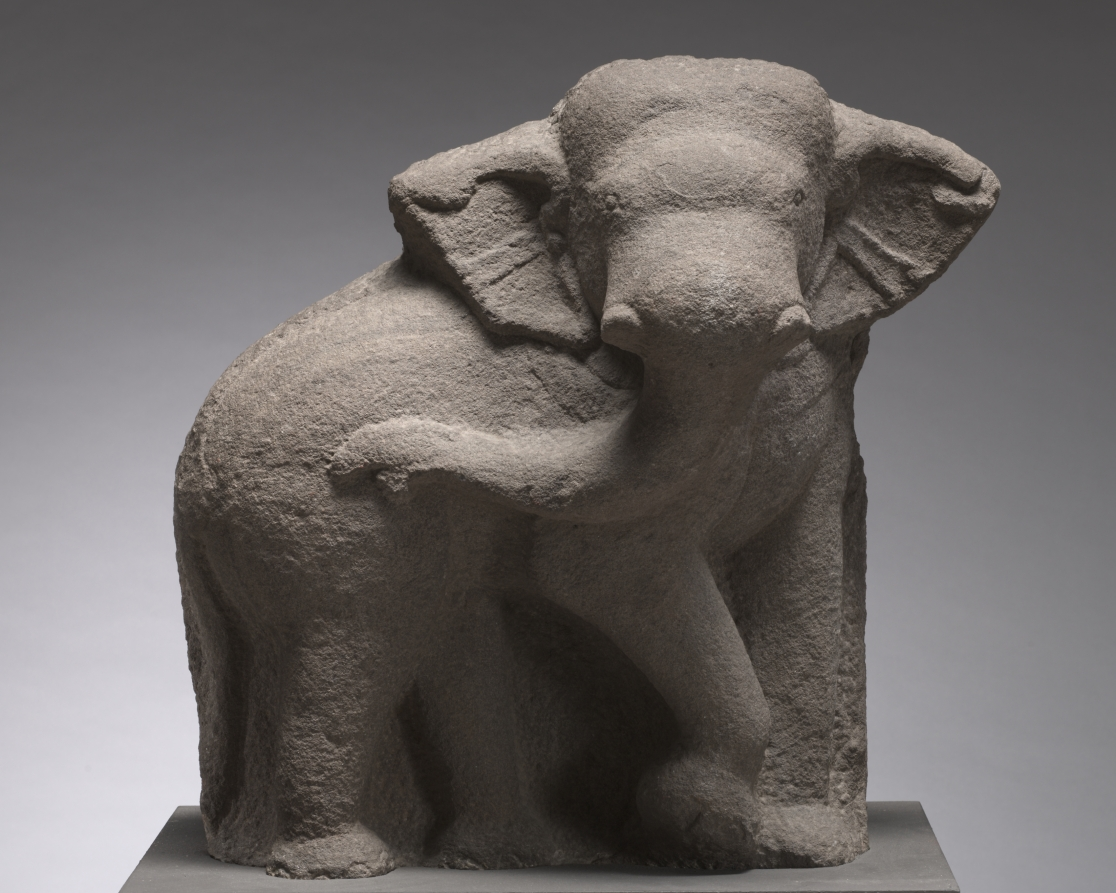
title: Elephant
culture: Vietnam, Tra-Kieu, 1st half of 10th Century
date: 900–950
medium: sandstone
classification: Sculpture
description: The Cham kingdom was located in present-day central Vietnam and was a powerful rival of the Khmer in Cambodia. During the time when this charming, naturalistic elephant sculpture was made, the Cham were actively absorbing stylistic elements from India.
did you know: The elephant's features are worn and softened due to weathering.